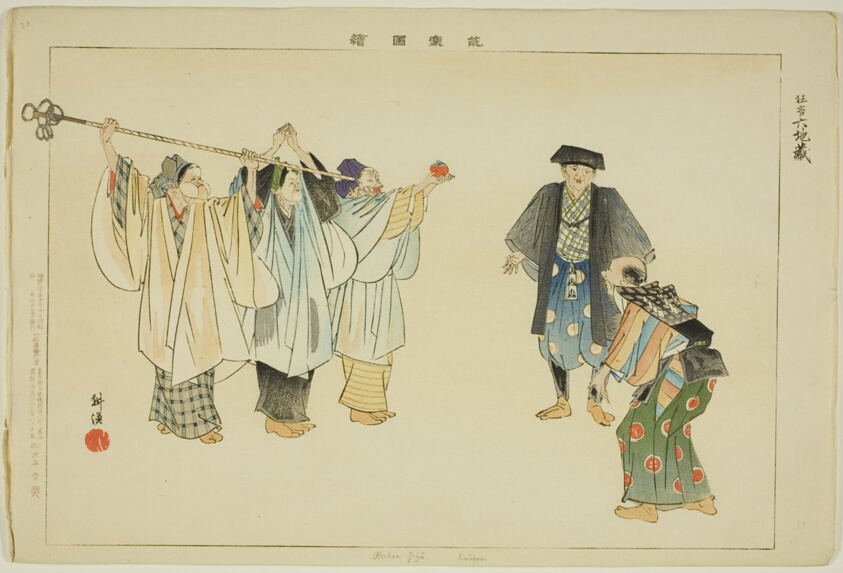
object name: Print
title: Rokujizo (Kyogen), from the series "Pictures of No Performances (Nogaku Zue)"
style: Japanese (culture or style)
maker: Tsukioka Kogyo; Japanese, 1869-1927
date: 1898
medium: Color woodblock print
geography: Japan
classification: woodblock print; print; asian art